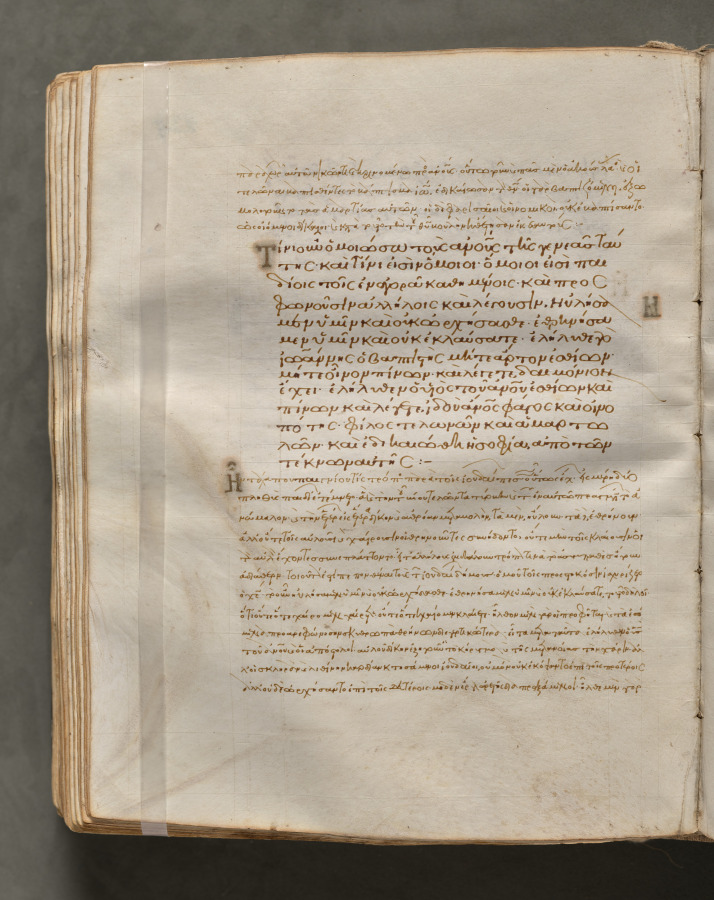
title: Text, folio 235 (verso), from a Gospel Book with Commentaries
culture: Byzantium, Constantinople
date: c. 1000–1100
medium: ink, tempera, and gold on vellum; leather binding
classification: Bound Volume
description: Each of the four gospels in this book opens on a page with brilliantly illuminated borders depicting the author of the text as well as birds—principally peacocks, symbols of the immortality of the soul—and fountains, representing the fountain of life and the salvation of the soul. This volume consists of 428 leaves with texts in Greek. Its level of sophistication suggests that it was probably written and decorated in a monastery in Constantinople.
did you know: Gospel books were carried in procession through Byzantine churches.